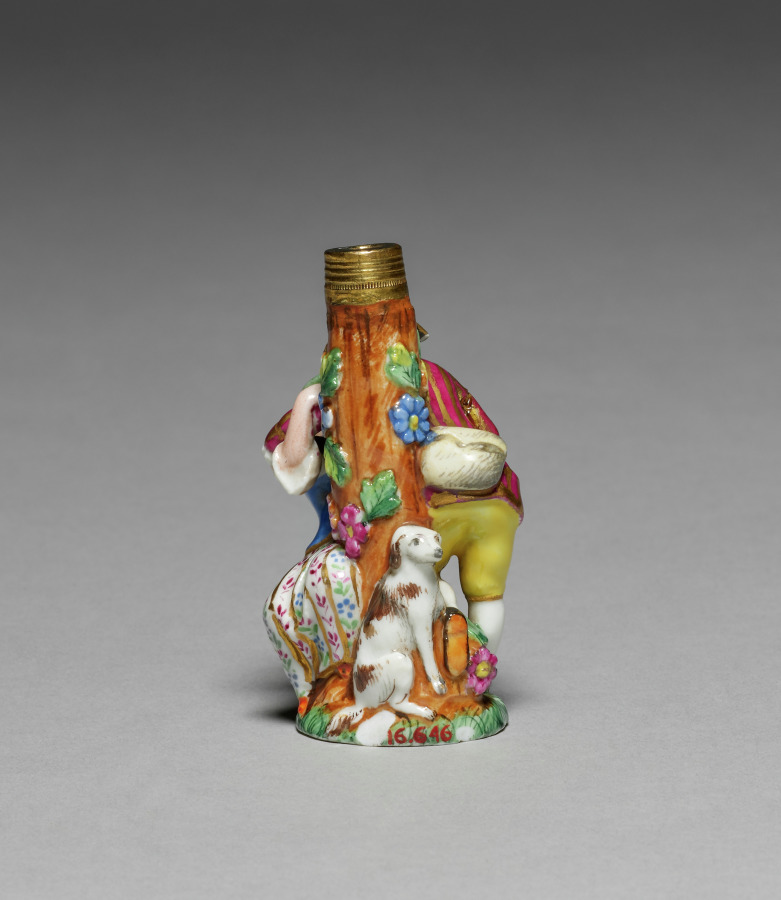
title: Scent Bottle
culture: Germany, Meissen, 19th century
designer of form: manner of Meissen Porcelain Factory (German, est. c. 1710)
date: 1800s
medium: porcelain with gilt metal mounts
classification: Miscellaneous